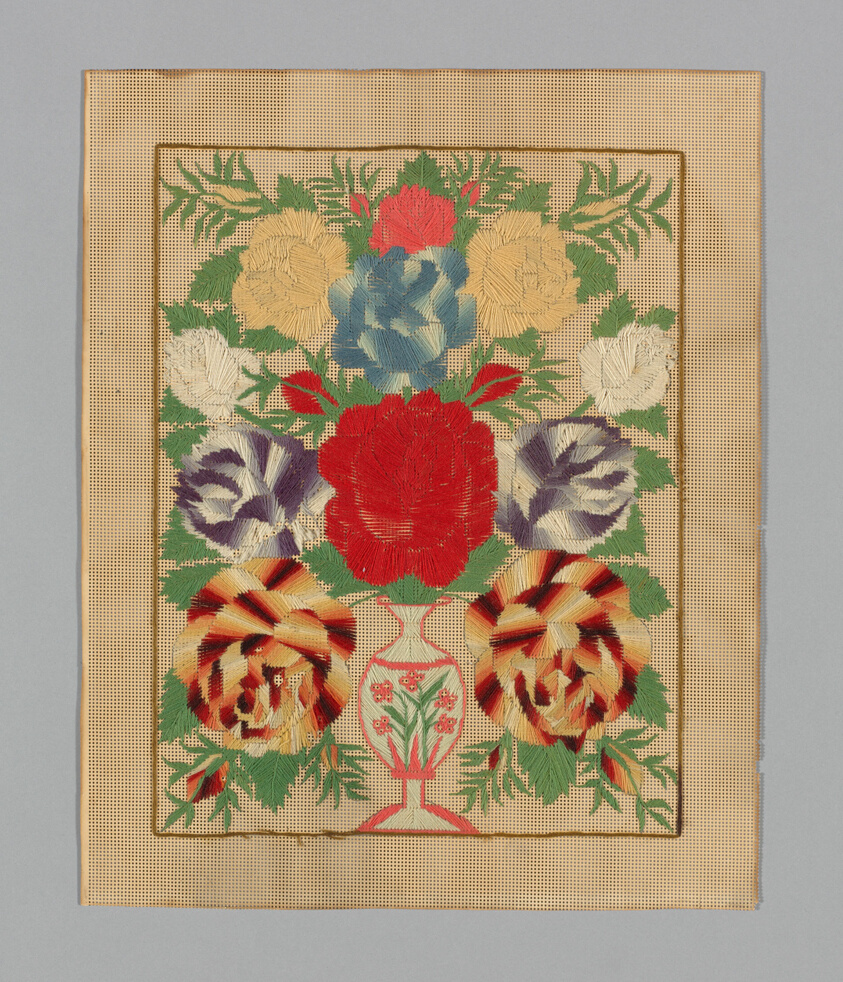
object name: Textile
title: Picture (Unfinished) (Needlework)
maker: Europe or United States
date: 19th century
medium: Cardboard(canvas), punched and embroidered with wool in satin and outline or stem stitches and couching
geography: Europe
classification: textile; needlework (visual works)